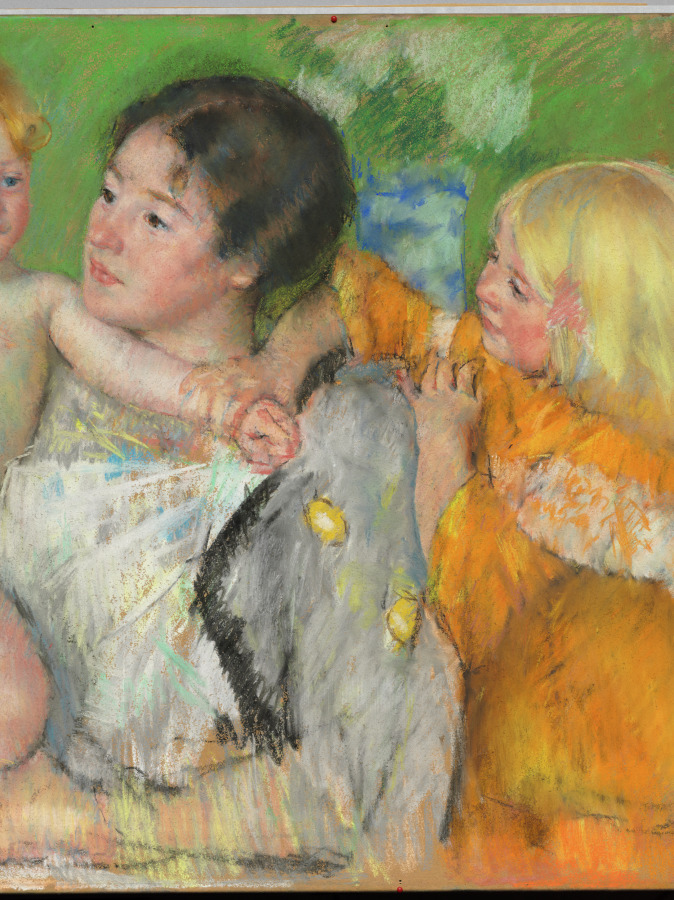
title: After the Bath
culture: America, late 18th-19th Century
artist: Mary Cassatt (American, 1844–1926)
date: 1901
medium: pastel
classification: Drawing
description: Mary Cassatt began using pastel in the 1870s and continued to experiment with the medium throughout her career. This drawing depicts a mother and child, one of the artist's preferred subjects. Cassatt typically used the technique seen here, in which she finished her sitters' faces with a high degree of detail but rendered the rest of the composition in a much looser and sketchier style.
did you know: Mary Cassatt once commented that pastel was "the most satisfactory medium for [portraying] children," since they could not sit still for long and the medium allowed for rapid sketching.